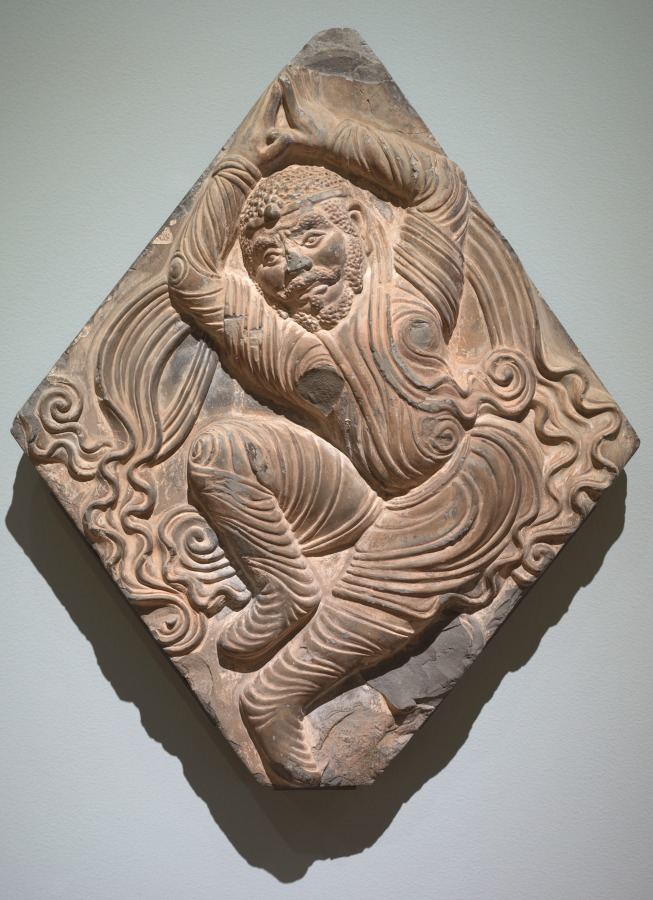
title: Architectural Brick with Dancer in Relief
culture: China, Henan Province, Anyang, Xiudingsi pagoda, Tang dynasty (618–907)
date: before 870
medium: molded terracotta with slip coating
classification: Ceramic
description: This brick originally formed part of the exterior wall of the pagoda at the Xiudingsi Buddhist monastery near Anyang, Henan province. The Xiudingsi pagoda, datable before 870 by an inscription carved on one brick, is the only building that survives from the once large monastic complex.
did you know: This bearded Western Asian figure is dancing with his scarf twisting into curling streamers.